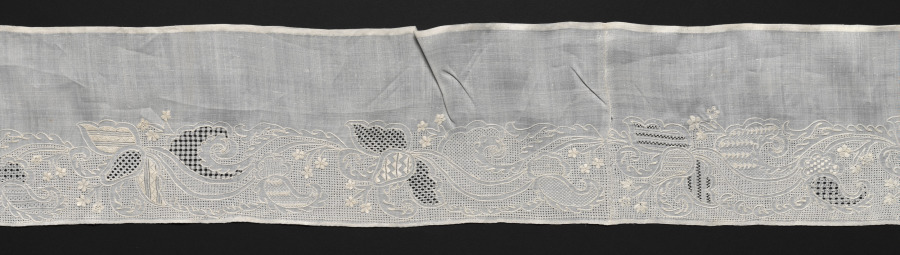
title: Embroidered Band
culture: France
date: 1800s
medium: Plain weave linen: needle lace (cutwork and drawnwork) and embroidery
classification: Embroidery